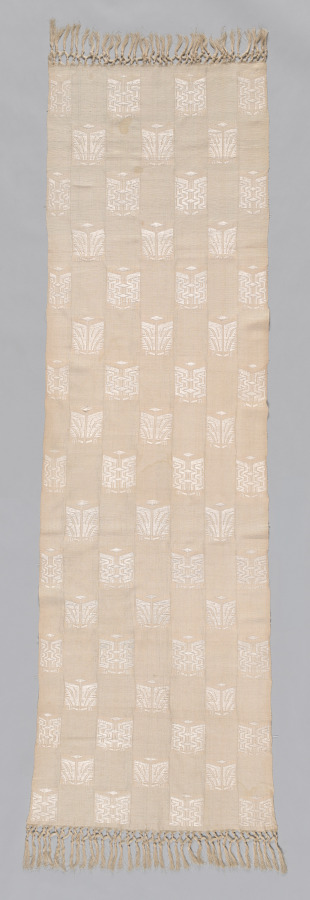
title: One of a pair of shawls (Lamba Landy Fotsy)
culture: Africa, East Africa, Madagascar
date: 1900s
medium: Silk (Bombyx mori and Borocera cajani)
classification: Textile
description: A lamba is an untailored textile worn by all ages, classes, and genders across much of Madagascar. This is an example of a woman’s garment made after Queen Ranavalona II made Christianity the state religion of the Merina Kingdom. Soon after, all-white lamba became popular for both Sunday church and daily wear. Fotsy is white in the Malagasy language. Indicating its owner’s worldliness, the white-on-white patterns alluded to fashionable imported textiles with damask patterns.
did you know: Invented in the mid-1800s, shawls like this were popular until about 2000.